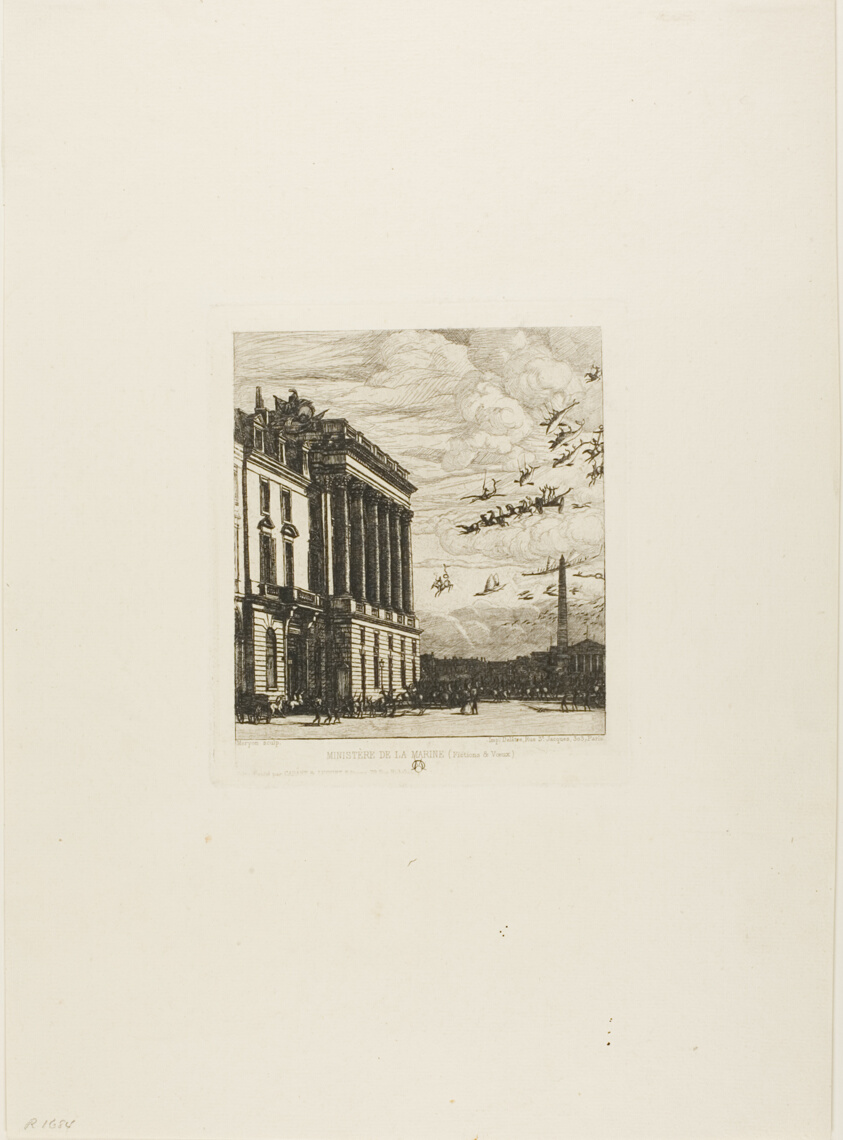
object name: Print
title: The Admiralty, Paris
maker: Charles Meryon (French, 1821-1868); printed by Auguste Delâtre (French, 1822-1907); published by Cadart & Luquet, Editeurs (French, 19th century)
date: 1865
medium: Etching on ivory laid paper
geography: France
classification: etching; print; prints and drawing